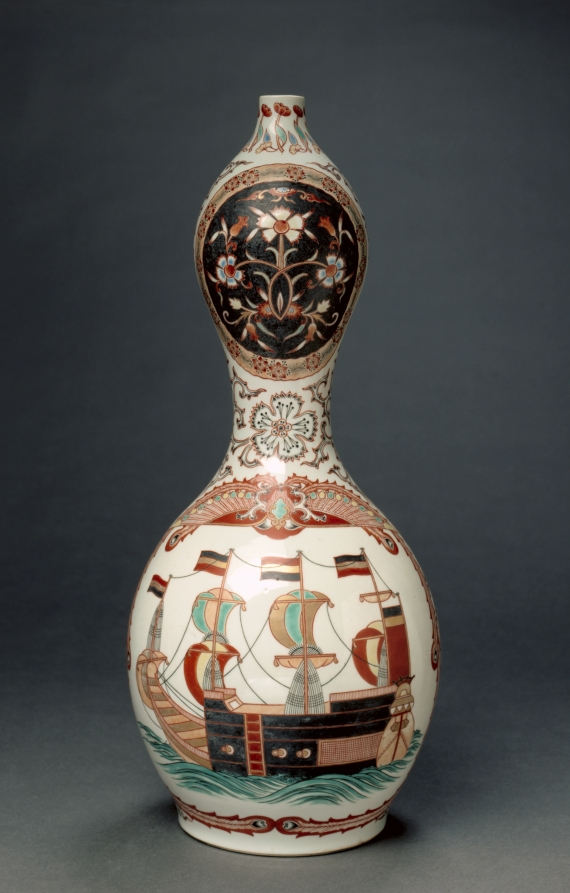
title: Bottle with Western Ships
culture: Japan, Edo period (1615–1868)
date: c. 1800–1868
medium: Porcelain with decoration in colored enamels and underglaze blue, overglaze enamels, and gold (Hizen ware, Arita type)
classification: Ceramic